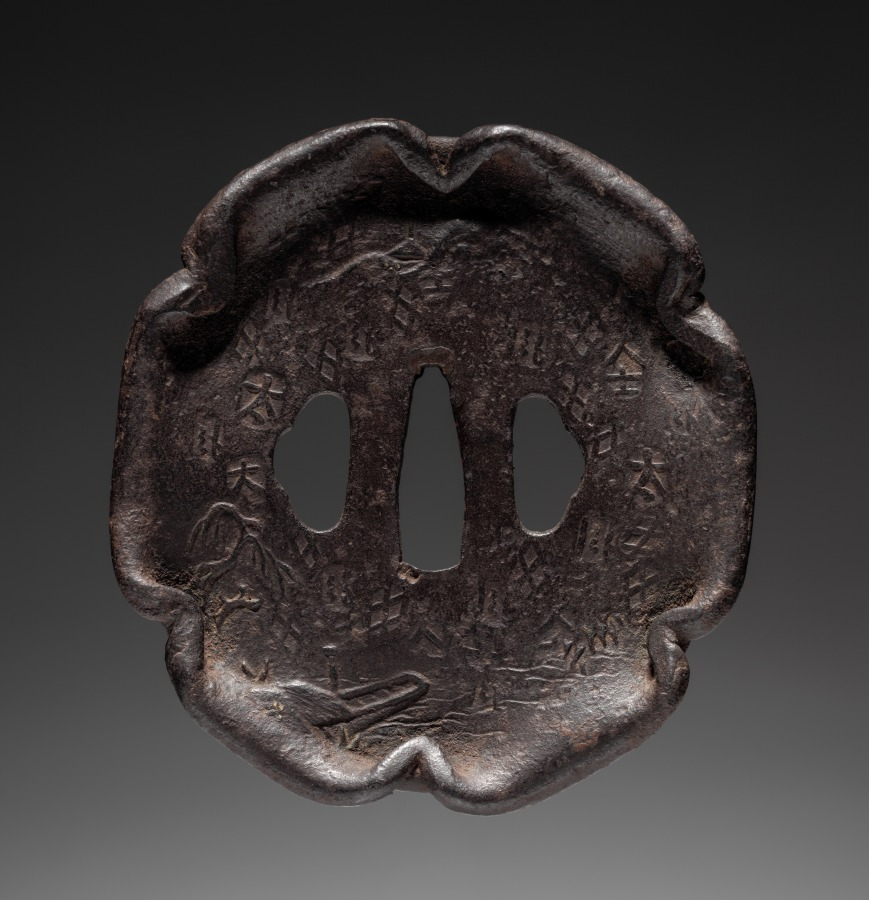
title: Sword Guard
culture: Japan, Edo period (1615–1868)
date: late 1600s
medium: iron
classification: Arms and Armor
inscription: Signature: Kaneiye, residing at Fukushima Yamashiro province